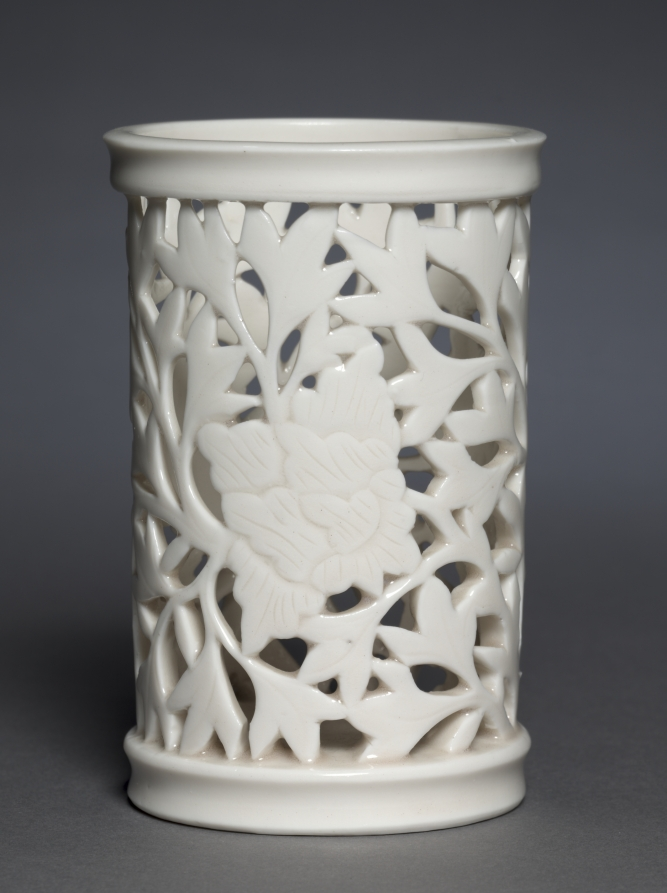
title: Brush Pot with Peonies: Dehua Ware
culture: China, Fujian province, Qing dynasty (1644-1911)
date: 1644–1911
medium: glazed porcelain with pierced and incised decoration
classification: Ceramic